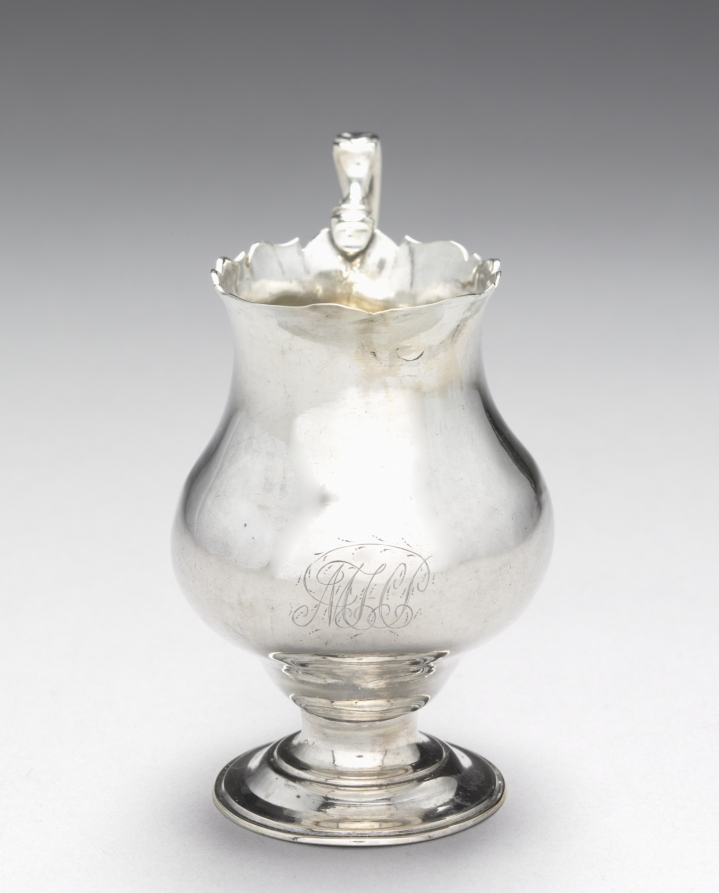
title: Cream Pitcher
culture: America, Massachusetts, Boston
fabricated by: Paul Revere II (American, 1735–1818)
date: c. 1765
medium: silver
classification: Silver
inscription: "P . . .H/to/P . . .E" in block letters under foot, and "MHP" in bright-cut script on front, opposite handle.